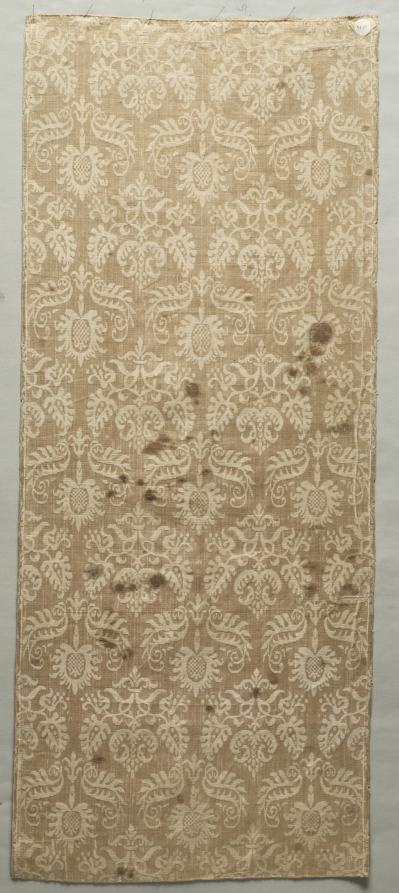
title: Silk and Linen Fragment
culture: Spain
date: 1600s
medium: fancy satin (damask): silk and linen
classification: Textile